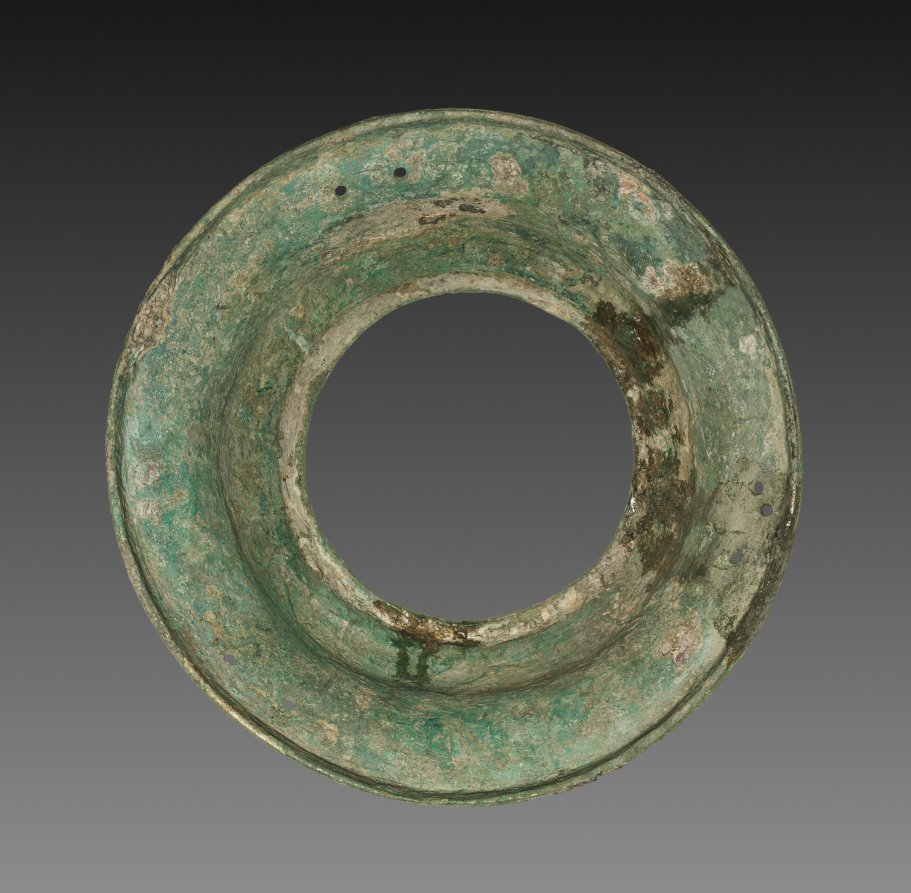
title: Bronze Volute Krater Base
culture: Greece, Laconia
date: late 600s BCE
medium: bronze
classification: Metalwork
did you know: This object supported a large vessel used for mixing wine with water called a krater.